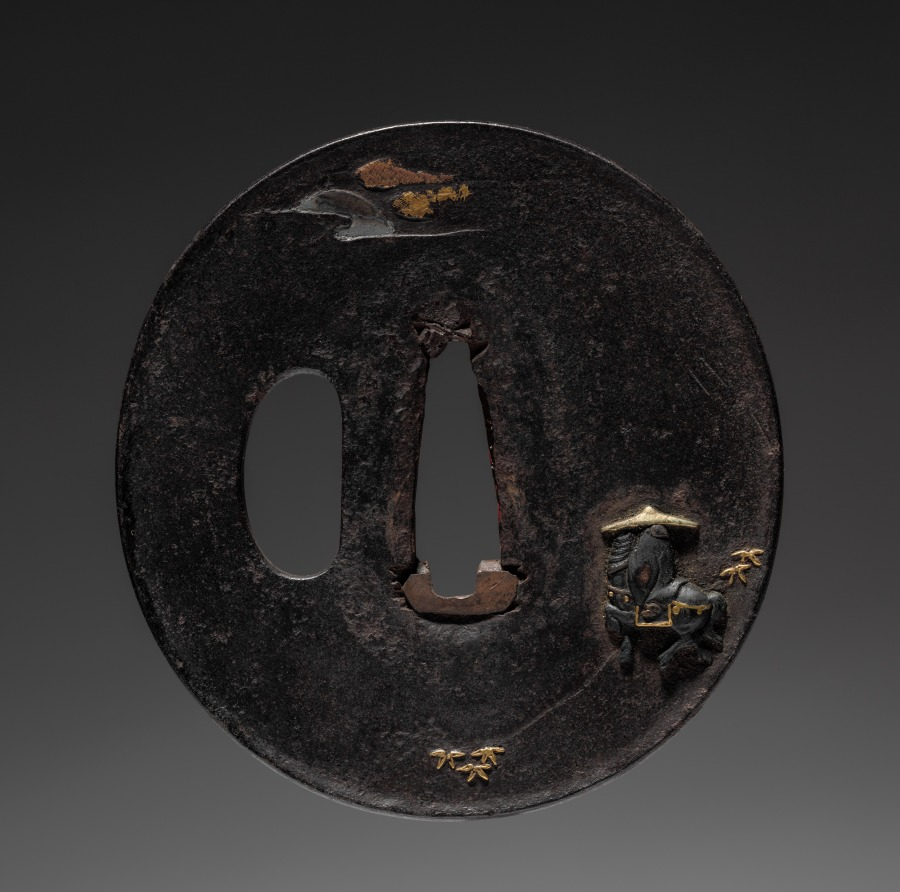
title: Sword Guard (Tsuba) with Traveler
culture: Japan, possibly Edo period (1615-1868)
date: c. 1615–1868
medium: iron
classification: Arms and Armor